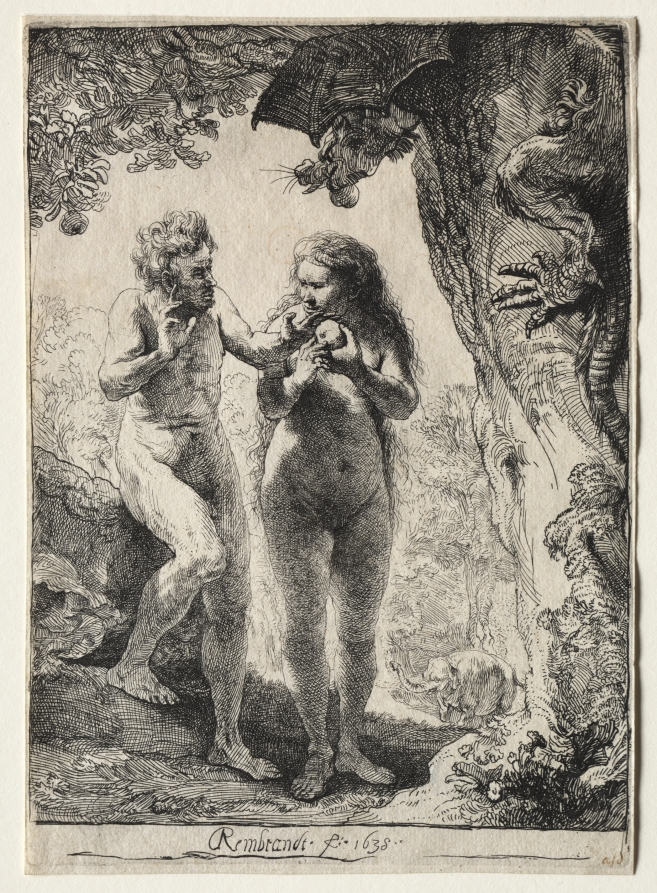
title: Adam and Eve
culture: Netherlands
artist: Rembrandt van Rijn (Dutch, 1606–1669)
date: 1638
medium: etching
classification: Print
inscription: lower center, in plate: Rembrandt· f·1638· ; lower right, in pen and brown ink: a/d ; VERSO, upper right, pen and ink: [illegible] ; lower center, in pen and brown ink (faded): [WR?] ; lower center, in graphite: [illegible] ; lower right, in graphite: [illegible]